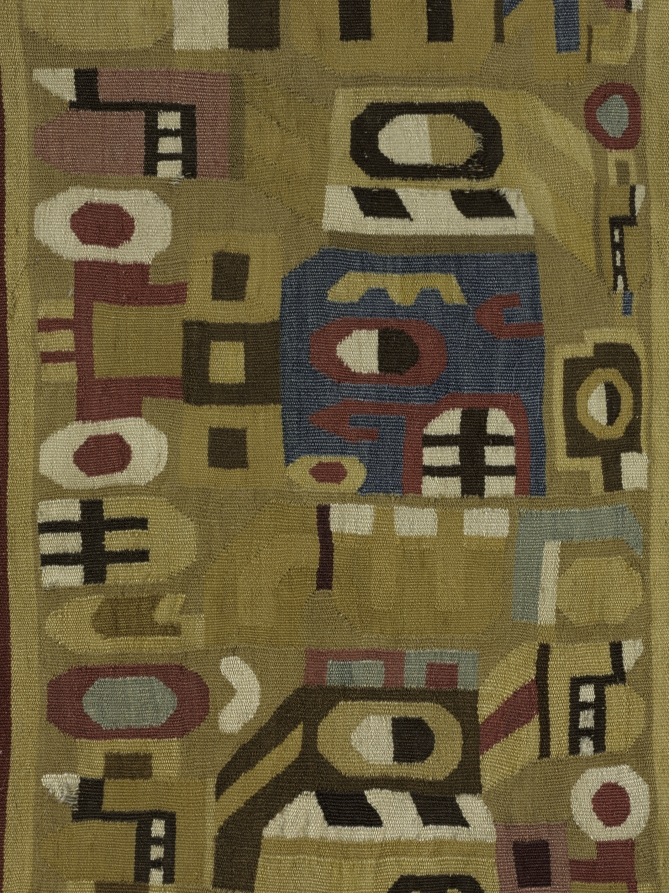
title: Tunic with Sacrificer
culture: South America, Peru, Central Andes, Middle Horizon, Wari people, 7th-11th century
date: 600–1000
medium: camelid-fiber, cotton; tapestry weave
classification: Textile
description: An extremely abstract supernatural sacrifice repeats in different colors and orientations across the body of this tunic, which was shortened on one side in antiquity. Look for the toothy black-and-white mouth in the sacrificer's upward-gazing head; other facial features include a button nose and a vertically divided eye. The figure holds the L-shaped haft of an axe behind its back and, at the front of its body, a short staff with a severed, upside-down human head on the top.